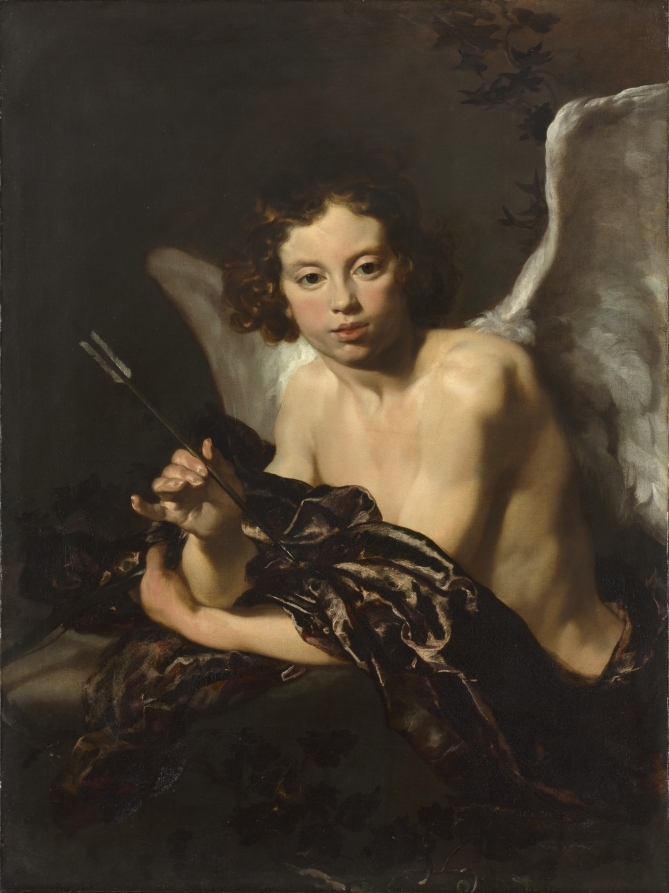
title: Cupid (Amor)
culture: Germany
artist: Johann Liss (German, c. 1597–1631)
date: c. 1630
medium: oil on canvas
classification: Painting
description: Johann Liss studied in Holland and Antwerp, and later (about 1620) traveled to Rome and Venice. His painting of Cupid—also known as Amor, the god of love—displays rich colors and fluid brushwork that were influenced by past Venetian masters (Titian, Tintoretto, or Veronese), while the deep contrasts of light and shadow reveal a stylistic debt to Caravaggio. The directness of Cupid’s gaze and the concentrated energy of his pose create a strong connection with the viewer.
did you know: Liss skillfully combined Dutch, Flemish, and Italian styles to create his own distinct manner.